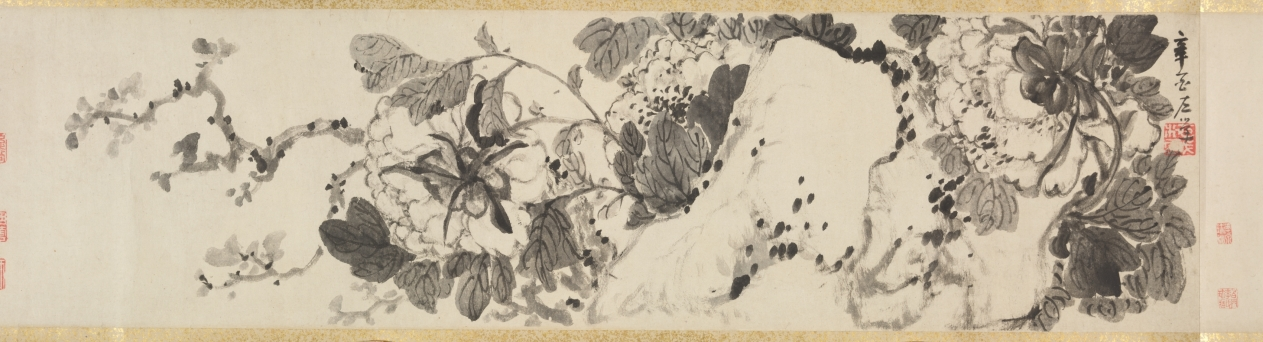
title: Plum Blossoms and Peonies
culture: China, Qing dynasty (1644-1911)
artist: Gao Fenghan (Chinese, 1683–1749)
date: 1741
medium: handscroll, ink on paper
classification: Painting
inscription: Artist's 2 inscriptions and 9 seals (the painting of Peonies with the artist's colophon and the colophon by Hou Chia-fan are on a single sheet of paper). Artist's inscription and 2 seals (Plum Blossoms): [seal] Ts'ai-yün. After finishing writing my colophon, I unrolled the painting to take another look, and it now seems that the composition here should have moved to the later part of the scroll. If that is the case, then the "Cool Beauty" [prunus] of the Solitary Hill is after all unable to take precedence over the "King of Flowers" [peony]. A laugh. Lao-fou inscribed. [seal] Feng-han. Artist's colophon (Plum Blossoms): [3 seals] Tun; Yen-yün-kung-yang, Hou-shang-tso-sheng. A few days after I painted this scroll for Shui- hsien [Yüeh Meng-yüan], the plum blossoms were in full bloom at his residence. He invited me over to enjoy them together for a long while, and I composed two additional poems and wrote them down here for his criticism. [Poems on the colophon are not translated.] First month, twenty-first day, your junior, Kao Feng-han of Nan-fou drafted this with the left hand. [seal] Feng-han. Artist's inscription and 4 seals (Peonies): Brushed with the left hand in the hsin-yu year [1741]. [seal] Yu-hsi. [3 seals at end of painting] Hou-shang-tso-sheng; Yen-yün-kung-yang; Shih-tsao-wu. Artist's colophon and seal (Peonies): The imperial concubine from the Yang family loved to dress in red, And from the emperor won the title of Hai-t'ang. But ever since she became the new dream of the moon palace, She changed into rainbow colors, while learning to dance. After I wrote the poem on Looking for Plum Blossoms in the Teng-wei Mountains, I attached to it a few branches of prunus, some bamboo tips and a piece of rock, with a scattering of green [moss] here and there to fill up the scroll. Unexpectedly, my playful fascination [with these subjects] was still not quite satisfied, so I made up these amorous ideas and romantic images [of the peony], to follow the footsteps of the fair lady of the Ku-hsieh Mountain [prunus]. Furthermore, I picked out one poem to be my vanguard. Perhaps such luminosity of wealth and power will be enough to overwhelm the poor fellows, and [they] will not mind the comparatively short length [of paper] assigned to it. Amusingly inscribed. Please correct me again. To Shui-hsien, my learned senior, your junior Han inscribed again. [seal] Tso-hua [left-handed painting]. 1 additional colophon and 5 additional seals: 1 colophon, dated 1742, and 3 seals of Hou Chia-fan (act. ca. 1742); 1 seal of P'u Ch'üan (20th c.?); 1 seal of Li family (dates unknown).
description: One of the so-called Yangzhou Eccentrics (a group of painters who lived in Yangzhou and were known for their unorthodox art and lifestyle), Gao Fenghan depicts China’s two most loved flowers in full bloom—the “cold beauty,” or plum blossom, in the first section, and the “king of flowers,” or peony, in the second section. Painted in 1741, the year when Gao decided to leave the south and return home to Shandong province in eastern China, this work was likely a token of farewell. His casual brushwork may indicate his mental and physical struggle at the time. After having crippled his right hand in 1737, Gao used his left hand to paint and achieved a crudeness and eccentric style unattainable before.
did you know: In East Asian art, peonies traditionally symbolize prosperity and wealth.